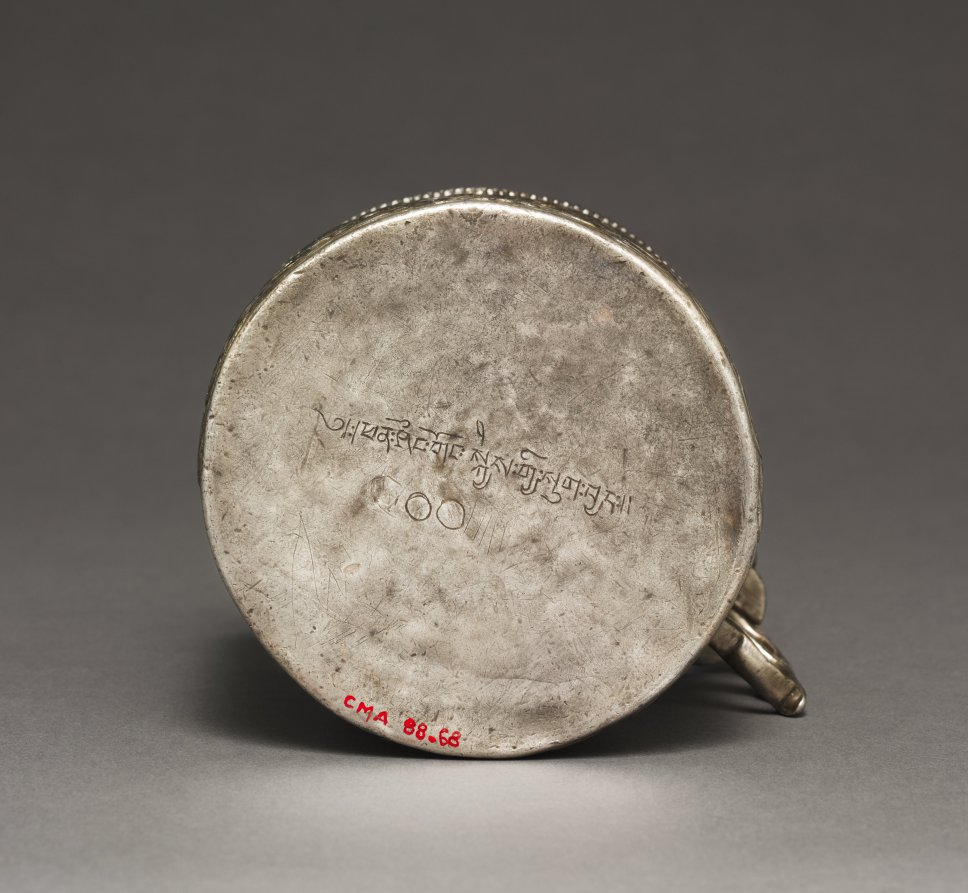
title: Beaker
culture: Central Asia (Sogdiana) or Tibet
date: c. late 600s–early 700s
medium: silver with gilding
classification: Silver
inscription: Inscribed on bottom of the cup: "Phan shing gong skyes gui sug byad (or byang)"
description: The circular shapes of the cup’s handle feature a flat edge on which the user rested their thumb for better grip, a design characteristic of silver objects made during the 700s by Sogdian artists, who traveled from Central Asia along international trade routes. An ownership inscription in Tibetan script on the underside of the cup identifies the vessel as a personal possession. The circles and lines carved below this inscription are likely measurements recording the weight of the silver used for the cup.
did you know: This cup depicts two lions and a lionlike animal with horns!